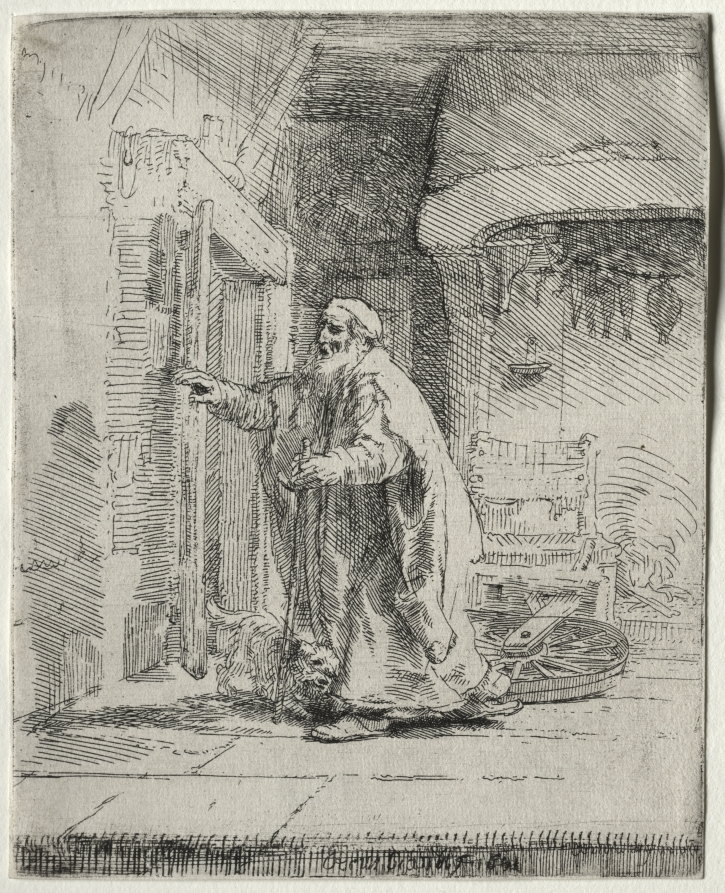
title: The Blindness of Tobit: The Larger Plate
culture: Netherlands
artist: Rembrandt van Rijn (Dutch, 1606–1669)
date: 1651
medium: etching with drypoint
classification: Print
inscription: lower center, in plate: Rembrandt f. 1651 ; lower right, in plate: Rembrandt f. 1651 ; VERSO, lower left, in graphite: B. 42. Bl. 15. R. II. / ptst. ; lower left, in graphite: [1 4 6 ?] ; lower left, in graphite: 54 ; lower left, in graphite: C[H Kru...ber?] ; lower center, in graphite: R922R ; lower right, in graphite: Tobit Blind